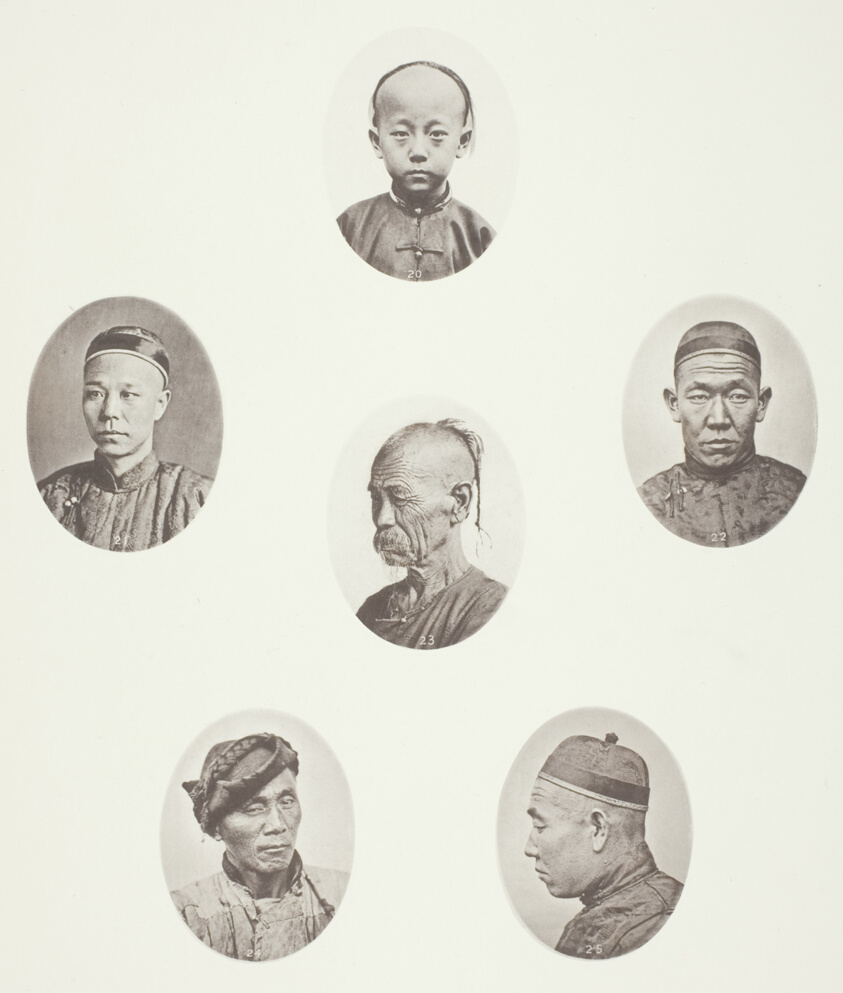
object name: Photograph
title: Cantonese Boy; Cantonese Merchant; Mongolian Male Head; A Venerable Head; A Labourer; Mongolian Male Head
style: 19th century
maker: John Thomson (Scottish, 1837–1921)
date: c. 1868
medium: Collotype, pl. IX from the album "Illustrations of China and its People, Volume II" (1873)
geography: Scotland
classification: photography; photograph